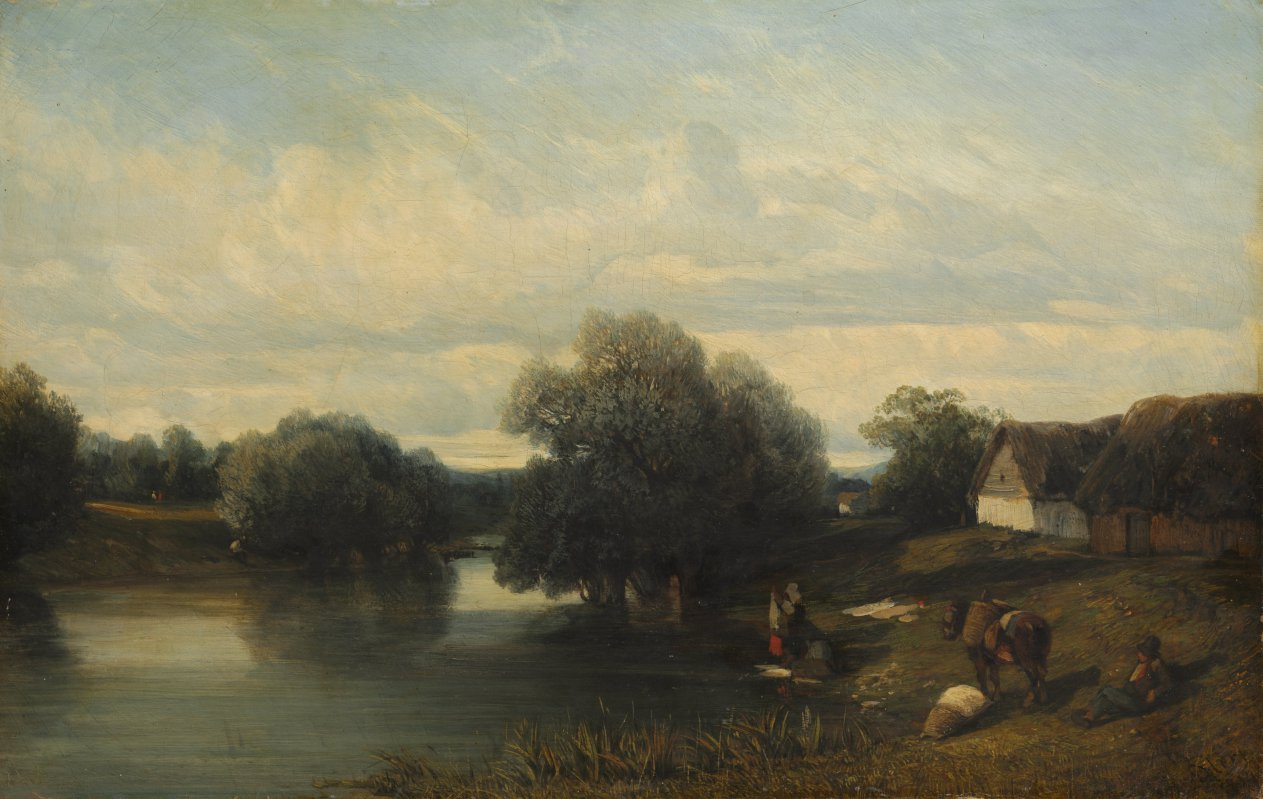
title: Cottage by the River with Washerwomen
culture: France, 19th century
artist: Camille Flers (French, 1802–1868)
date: 1835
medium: oil on fabric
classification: Painting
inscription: Signed lower right: Flers / 1835